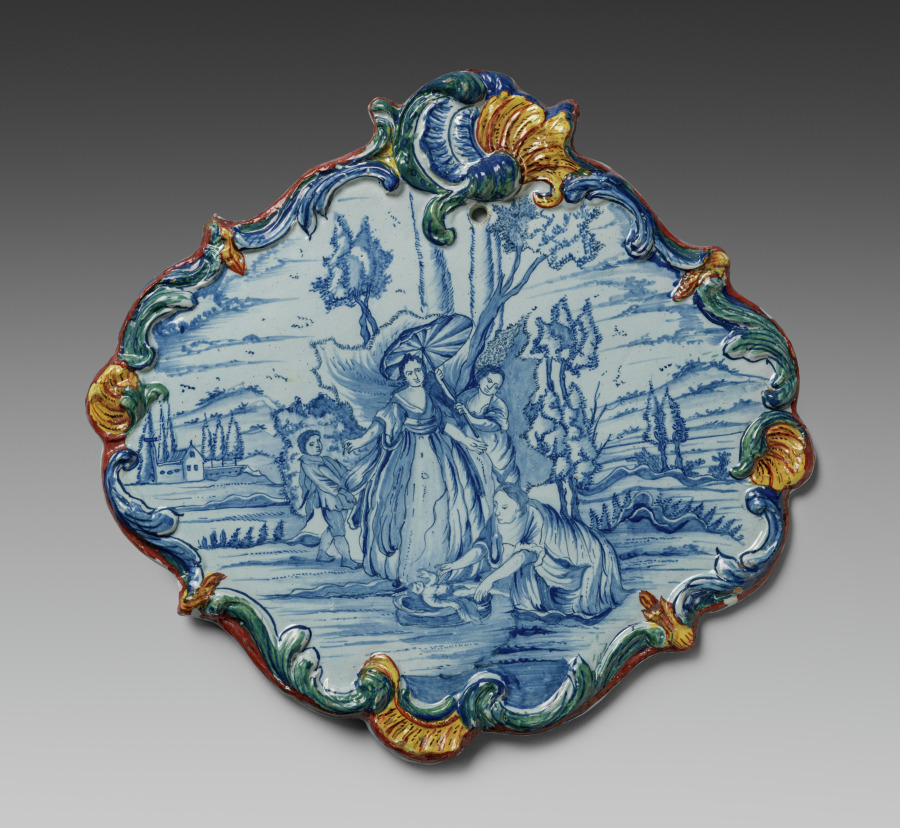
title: Plaque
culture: Netherlands, Holland, Delft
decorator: Unknown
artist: after Jacopo Amigoni (Italian, 1675–1752)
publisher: after Joseph Wagner (German, 1706–1780)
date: c. 1750–70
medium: delft ware (tin glazed earthenware)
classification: Ceramic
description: This plaque depicts the biblical scene of the finding of Moses. The Book of Exodus recounts how during the captivity in Egypt of the Jewish people, the pharaoh decreed that all newborn sons of Hebrews should be cast into the river. The infant Moses was placed by his mother in a basket among the bulrushes. He was discovered there by the pharaoh’s daughter, who is shown here under the parasol, accompanied by her servants. A plaque after the same print is in the Rijksmuseum, Amsterdam.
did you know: The iconic blue-and-white ceramics from Delft originated as an attempt to copy Chinese porcelain.